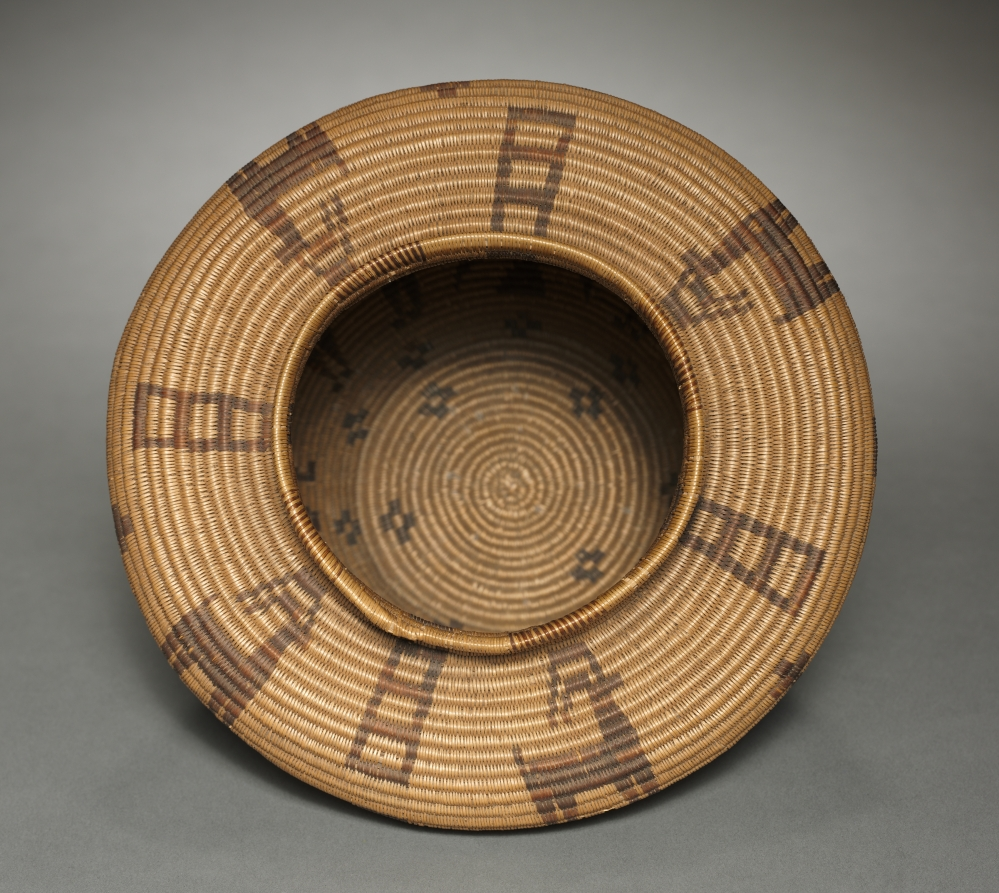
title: Jar-shaped Basket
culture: Native North America, Great Basin, California, Death Valley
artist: Sarah Hunter (Timbisha Shoshone (Panamint), 1883–1967)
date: 1910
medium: Willow, bulrush; coiled (3 rods)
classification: Basketry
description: Sarah Hunter’s basketry is noted for geometricized motifs reminiscent of the animals depicted in petroglyphs on canyon walls in the Death Valley region. Here they include pronghorn mountain sheep, deer, and birds, along with humans, all created in light-brown bulrush against a honey-colored willow ground. Traditional Indigenous basket weavers, who have exhaustive knowledge of the plant world, tend, harvest, and prepare their own materials. If stages of the process are not done properly and at the right time, color will be uneven and stitches will twist and split.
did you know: Some Timbisha Shoshone women continue traditions of basket weaving to the present day.